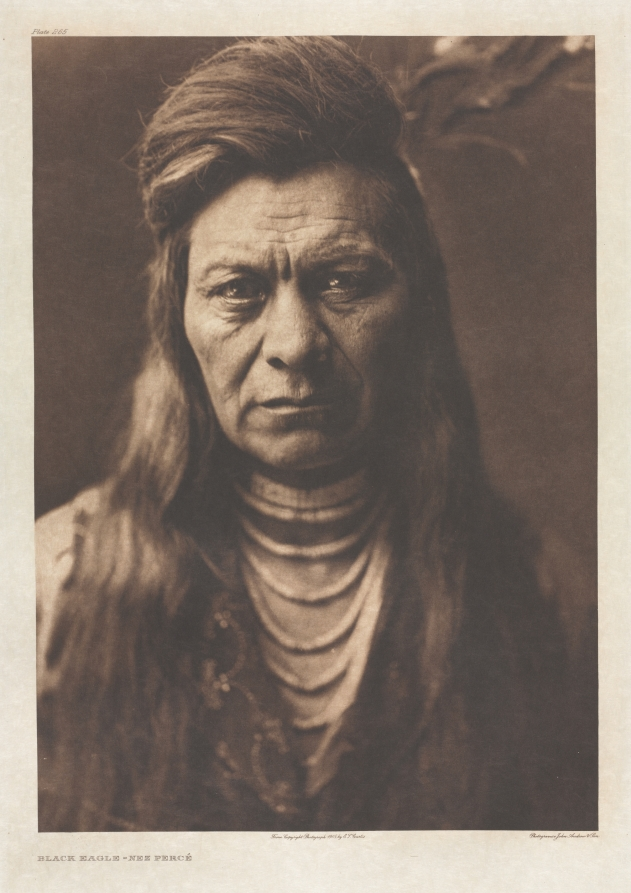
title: Portfolio VIII, Plate 265: Black Eagle - Nez Percé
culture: America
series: The North American Indian: being a series of Portfolios picturing and describing the Indians of the United States, the Dominion of Canada, and Alaska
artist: Edward S. Curtis (American, 1868–1952)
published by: The University Press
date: 1905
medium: photogravure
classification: Portfolio